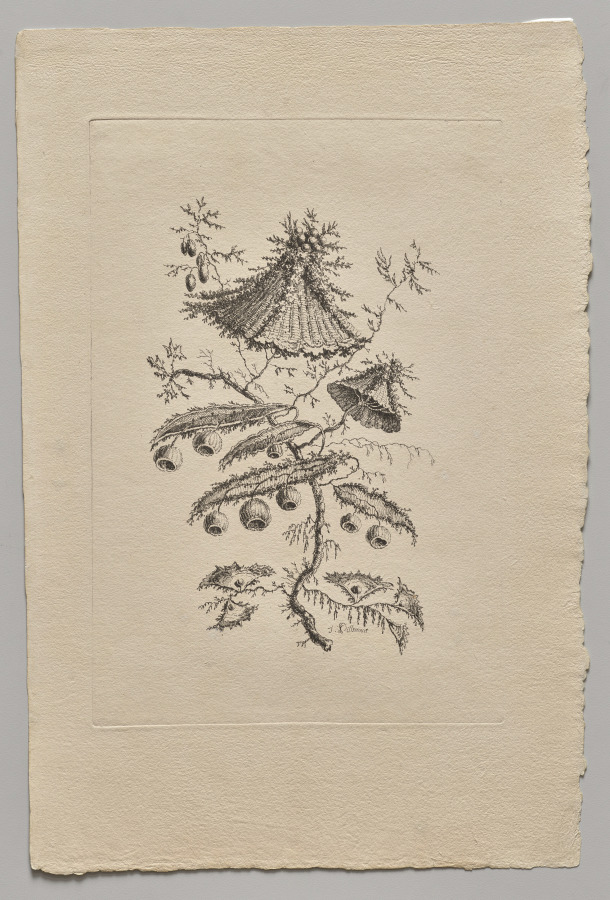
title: Persian Flowers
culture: France, 18th century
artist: Jean Baptiste Pillement (French, 1728–1808)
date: 1755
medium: etching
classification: Print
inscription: Watermark: a partial (lower half) Dovecote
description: Jean Baptiste Pillement was one of the most influential designers of the Rococo period, known for his varied and prolific chinoiseries (European variants of Chinese and Japanese motifs). His designs were spread throughout Europe primarily via their translation into prints. This print is one of a set of six etched by Pillement himself. Each depicts a so-called “Persian” flower, largely fantasies, presenting strange, alienlike floral forms that could be adapted to various uses from textiles to wall decorations.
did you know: The artist Jean Baptiste Pillement was employed by Marie Antoinette to create decorations for her legendary retreat, the Petit Trianon, at Versailles.